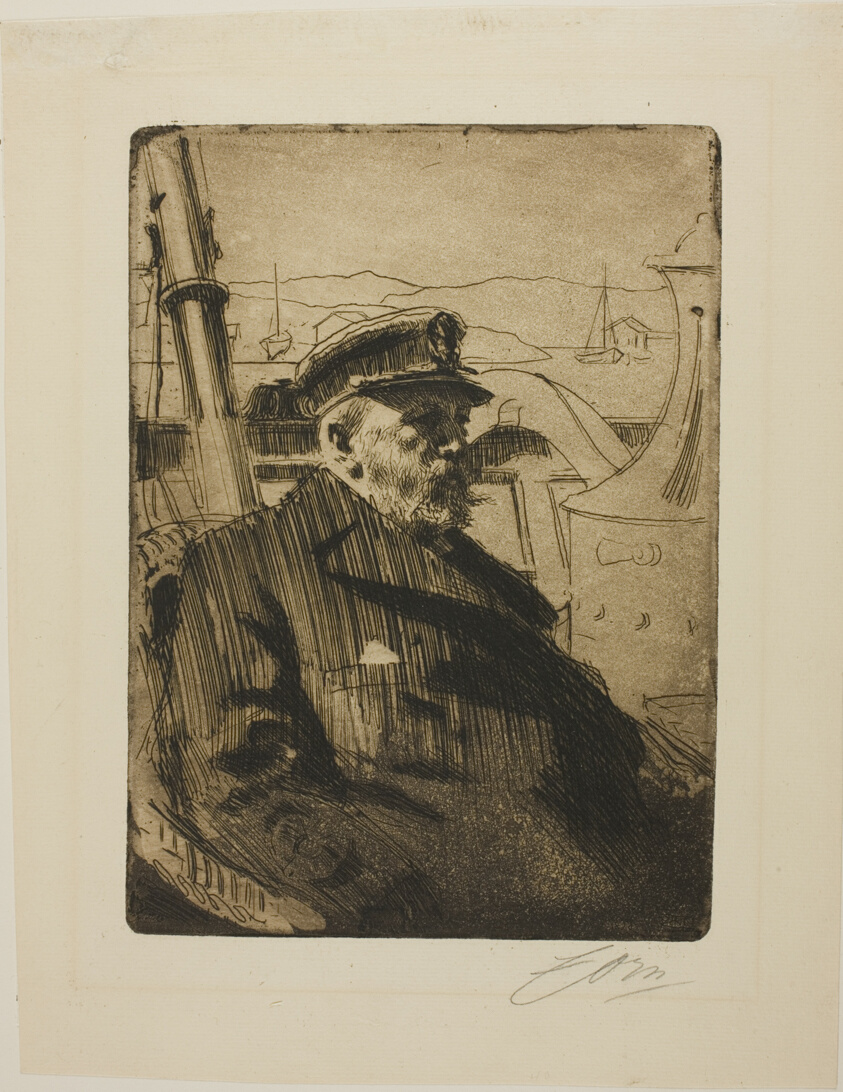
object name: Print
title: King Oscar II (Second plate)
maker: Anders Zorn (Swedish, 1860-1920)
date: 1898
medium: Etching on ivory laid paper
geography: Sweden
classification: etching; print; prints and drawing